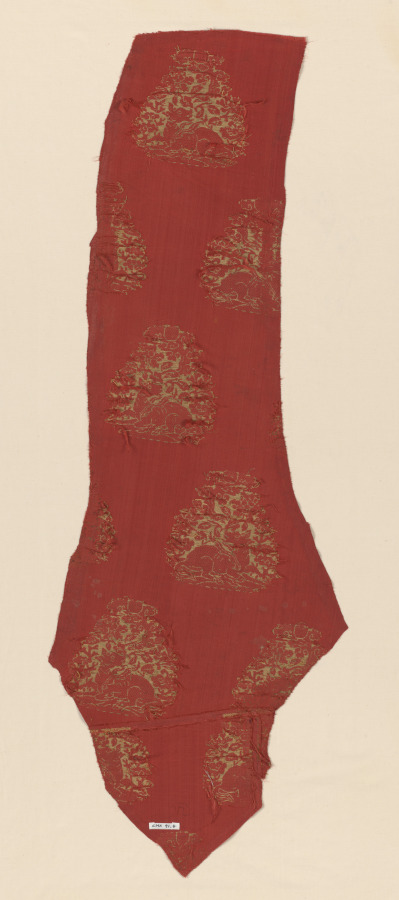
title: Brocade with Djeiran Gazing at the Moon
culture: China, Jin dynasty (1115-1234)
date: 1115–1234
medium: Silk and gold thread; tabby, brocaded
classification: Textile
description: The mysterious image of a deerlike animal gazing up at the moon among clouds has been variously interpreted over many centuries. The animal, lying down with one foreleg extended and looking back, originated as a djeiran, or Central Asian antelope. Commonly appearing on Sogdian silver from the 600s onward, the motif migrated via the trade routes to northern China. There, during the Jin and Yuan (1279–1368) dynasties, it was very popular and always depicted with the moon supported by clouds. Chinese writers often identify the djeiran as the mythical rhinoceros (xi'niu) that is said to gaze at the moon, or as the cow of Wu "panting upon seeing the moon."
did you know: The gold-brocaded pattern is repeated in staggered rows with alternating orientations.